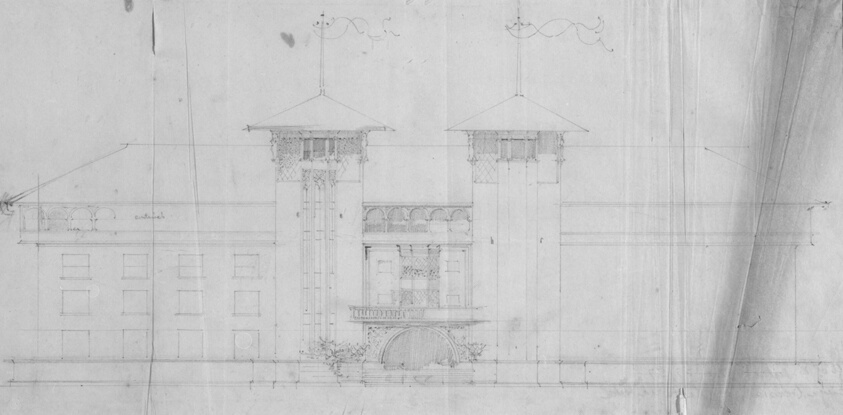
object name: Architectural Drawing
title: Chattanooga Hotel Project, Chattanooga, Tennessee, Elevation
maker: Adler & Sullivan, Architects (American, fl. 1883–1895)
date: c. 1892–1893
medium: Graphite on tracing paper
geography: United States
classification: architecture; architectural drawing